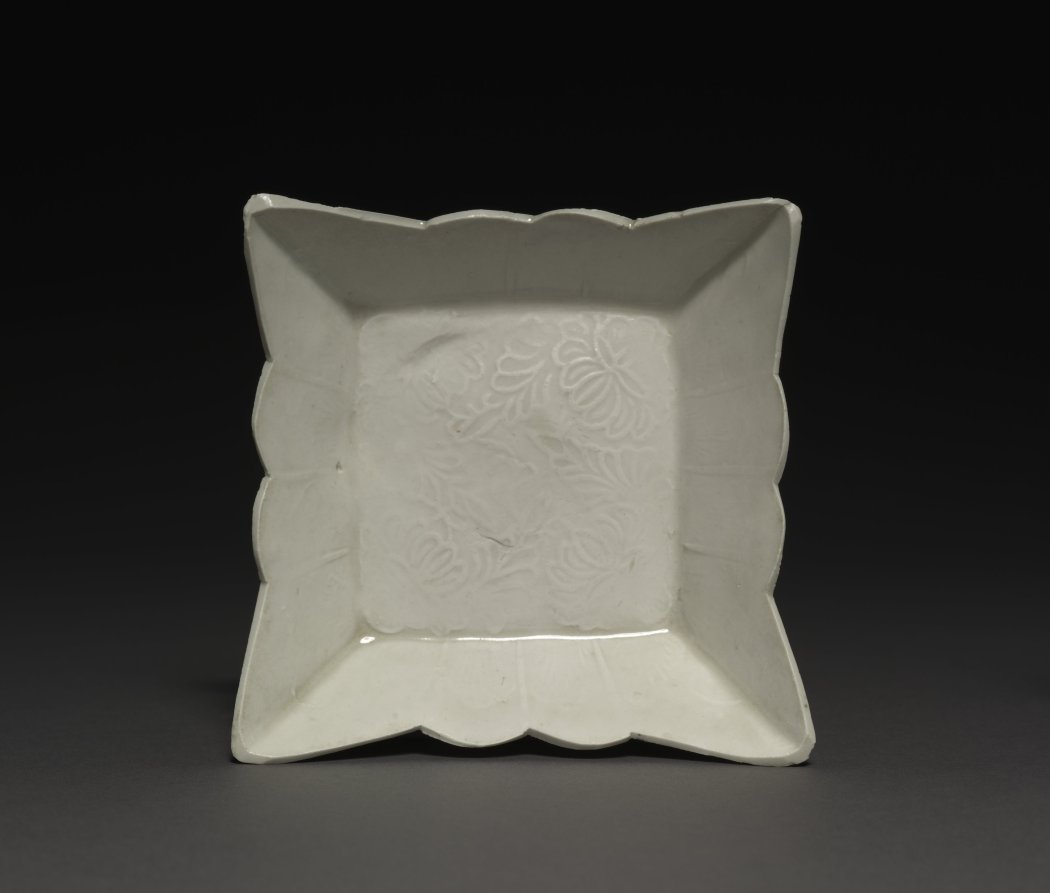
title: Square Dish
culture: Northeast China, Liao dynasty (916-1125)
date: 916–1125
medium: white porcelain with impressed decoration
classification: Ceramic